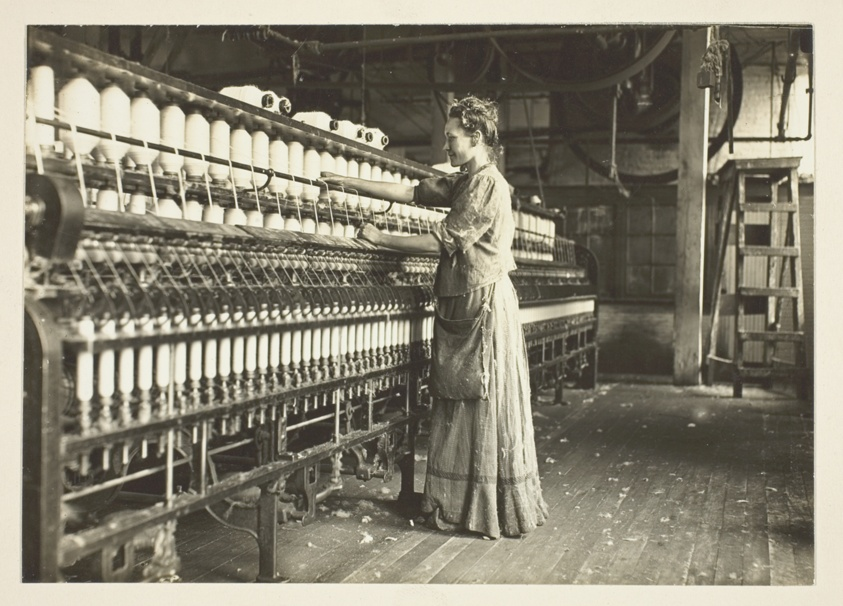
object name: Photograph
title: Old-Time Spinner in Southern Cotton Mill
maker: Lewis Wickes Hine (American, 1874–1940)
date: 1910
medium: Gelatin silver print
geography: United States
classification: gelatin silver (developing-out-paper) pr; photographic process; photography; photograph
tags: Collected by Hugh Edwards, documentary